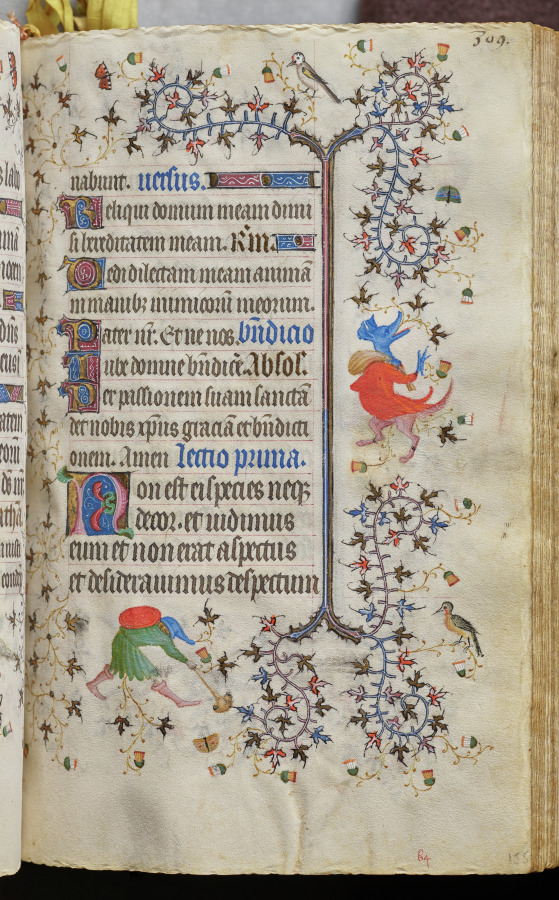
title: Hours of Charles the Noble, King of Navarre (1361-1425): fol. 155r, Text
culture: France, Paris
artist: Master of the Brussels Initials and Associates (French)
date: c. 1405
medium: ink, tempera, and gold on vellum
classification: Bound Volume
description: This precious volume was obviously highly prized by its owner, the French-born King of Navarre, who had his coat of arms painted on no less than twenty folios. Rather than directly commissioning this manuscript from a specific workshop, it seems that Charles the Noble acquired his book of hours -- perhaps ready-made for the luxury market -- while on a trip to Paris in 1404-05. A collaborative effort, six painting styles are evidenced within the pages of this codex, those of two Italians, two Frenchmen, and two Netherlanders. The painter who was responsible for the planning and decoration of the book, and who produced seventeen of the large miniatures, was a Bolognese artist known as the Master of the Brussels Initials. His principal assistant, responsible for most of the borders, was a Florentine who signed his name "Zecho" da Firenze on folio 208 verso.